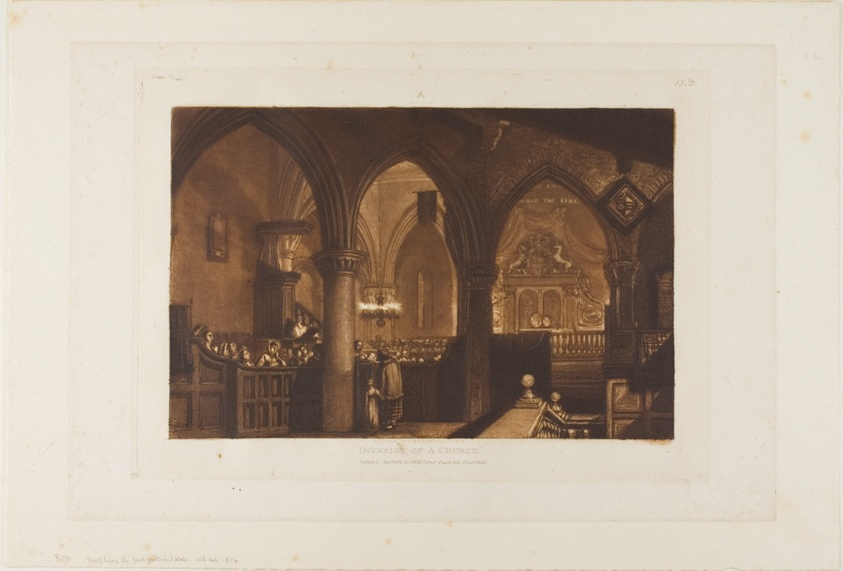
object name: Print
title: Interior of a Church, plate 70 from Liber Studiorum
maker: Joseph Mallord William Turner (English, 1775-1851)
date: published January 1, 1816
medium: Mezzotint and etching in brown on cream laid paper, laid down on cream wove paper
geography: England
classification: mezzotint; print; prints and drawing